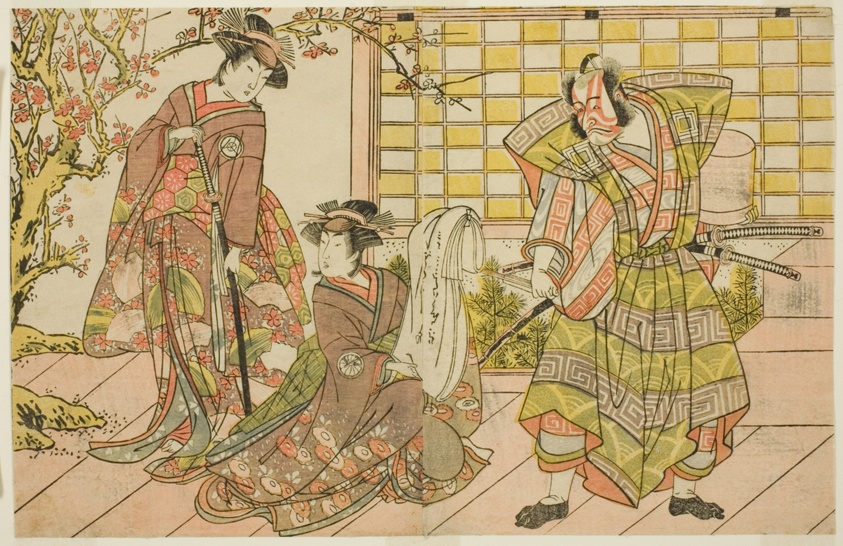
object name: Print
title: The Actors Ichikawa Danjuro V as Miura Kunitae (right), Segawa Kikunojo III as Yasukata (center), and Iwai Hanshiro IV as Utou (left), in the Play Godai Genji Mitsugi no Furisode, Performed at the Nakamura Theater in the Eleventh Month, 1782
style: Japanese (culture or style)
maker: Katsukawa Shunsho 勝川 春章; Japanese, 1726-1792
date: c. 1782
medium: Color woodblock print; double-page illustration from an unidentified theatrical picture-book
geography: Japan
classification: woodblock print; print; asian art